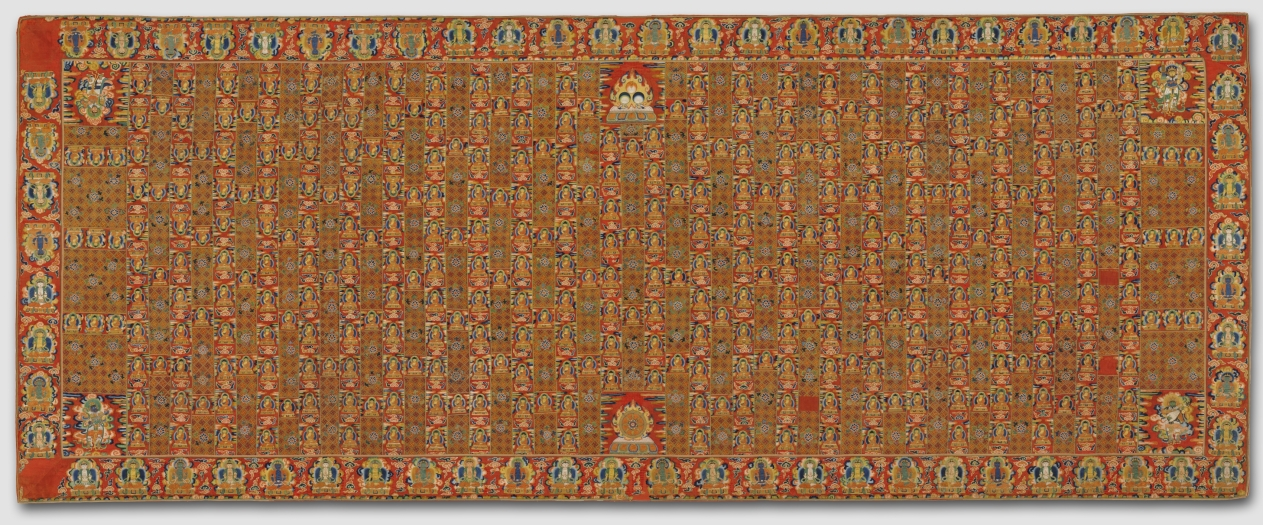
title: Buddhist Priest's Ceremonial Robe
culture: China, Ming dynasty (1368–1644)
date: 1400s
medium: silk and gold thread; embroidery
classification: Garment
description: This example of imperial embroidery is one of the earliest surviving Chinese Buddhist robes (kasaya) in the West. Depicting 991 Buddhas, each slightly different, it is constructed out of patches in reference to the legend in which the Buddha's favorite disciple divided a robe he was given into 30 pieces. Patchwork is also a sign of humility. Multiple Buddha images known as “thousand Buddha” designs are seen painted and sculpted on the walls of cave temples in India, Afghanistan, Central Asia, and China, but are rare on garments. The Four Heavenly Kings, guardians of the four directions, occupy the textile’s corners. When draped around the body, the inverted figures in the upper left corner appear right side up. Robes with 25 columns were worn by the highest-ranking clergy on ceremonial occasions.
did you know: The Five Transcendent Buddhas, who symbolize the purity of the five elements, are repeated around the edges.